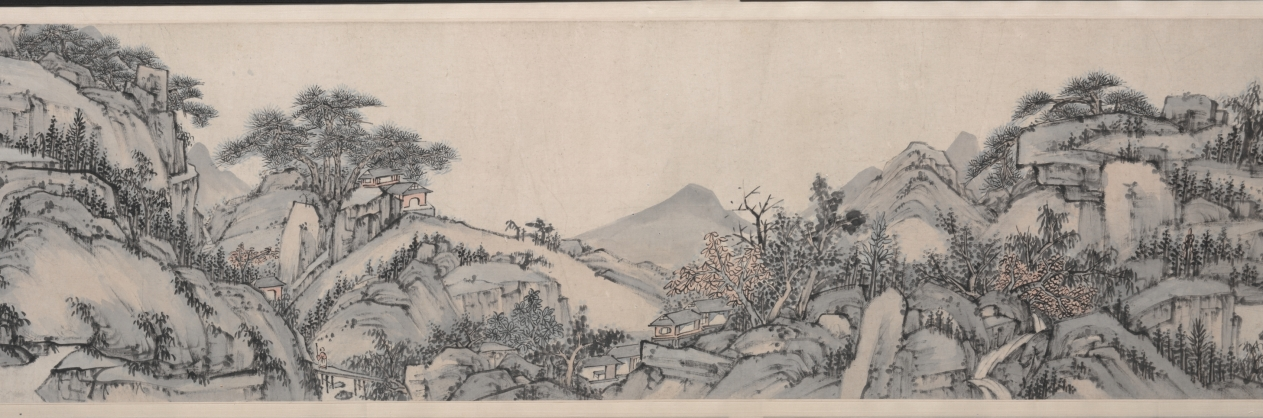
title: Pure Tones among Hills and Waters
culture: China, Qing dynasty (1644-1911)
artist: Xiao Yuncong (Chinese, 1596–1673)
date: 1664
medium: Handscroll; ink and light color on paper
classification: Painting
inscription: 種松發秀色，具是高人心。/ 鑿石築茅屋，長年覆綠陰。/ 白雲無意出，舒卷趨空林。/ 萬籟時一寂，微風墮清音。/ 此情莫可擬，此景誰能論。/ 只向千峰裏，共彈五絃琴。/ 桃花依綠水，不覺又春深。 甲辰花朝題于青蓮閣, 鐘山老人蕭雲從。[印] 鐘山老人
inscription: Title and inscription, dated 1744, and 3 seals of Shen Feng 沈鳳 (1685-1755).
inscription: 4 colophons and 24 additional seals: 1 colophon, dated 1811, and 5 seals of Xiang Yuan 項源 (active about 1811); 1 colophon, dated 1858, and 2 seals of Qi Junzao 祁寯藻 (1793-1866); 1 colophon and 4 seals of Zhang Yunzhong 張允中 (1881–1960?); 4 seals of Jiang Xun 江恂 (active about 1753–after 1780); 1 colophon dated 1943, and 2 seals of Wang Shaoming 汪兆銘 (Wang Jingwei 汪精衛, 1883–1944); 1 seal of Qi Zhiliu 祁之鏐 (active about 1858); 2 seals of Yu Zhimeng 俞芷盟 (second half of 19th century); 4 seals unidentified.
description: Painted at age 68, this landscape is one of Xiao Yuncong’s most mature works. Extraordinary in its combination of fine details with bold brushstrokes and bluish washes, it is also one of his longest compositions in handscroll format, extending over 23 feet. Throughout his lifetime, Xiao visited Nanjing and Yangzhou, where he met with other painters and literati. Regarded as the founder of the Gushu school (姑孰派) of painting, Xiao painted from nature, and his landscapes are informed by his travels, as well as by his experience as a print designer.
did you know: Biographical notes on Xiao Yuncong relate that he did not pursue the career of an official, but "furnished a cottage in the eastern suburbs [of Wuhu in Anhui province] and amused himself playing the qin (zither) and reading every day."